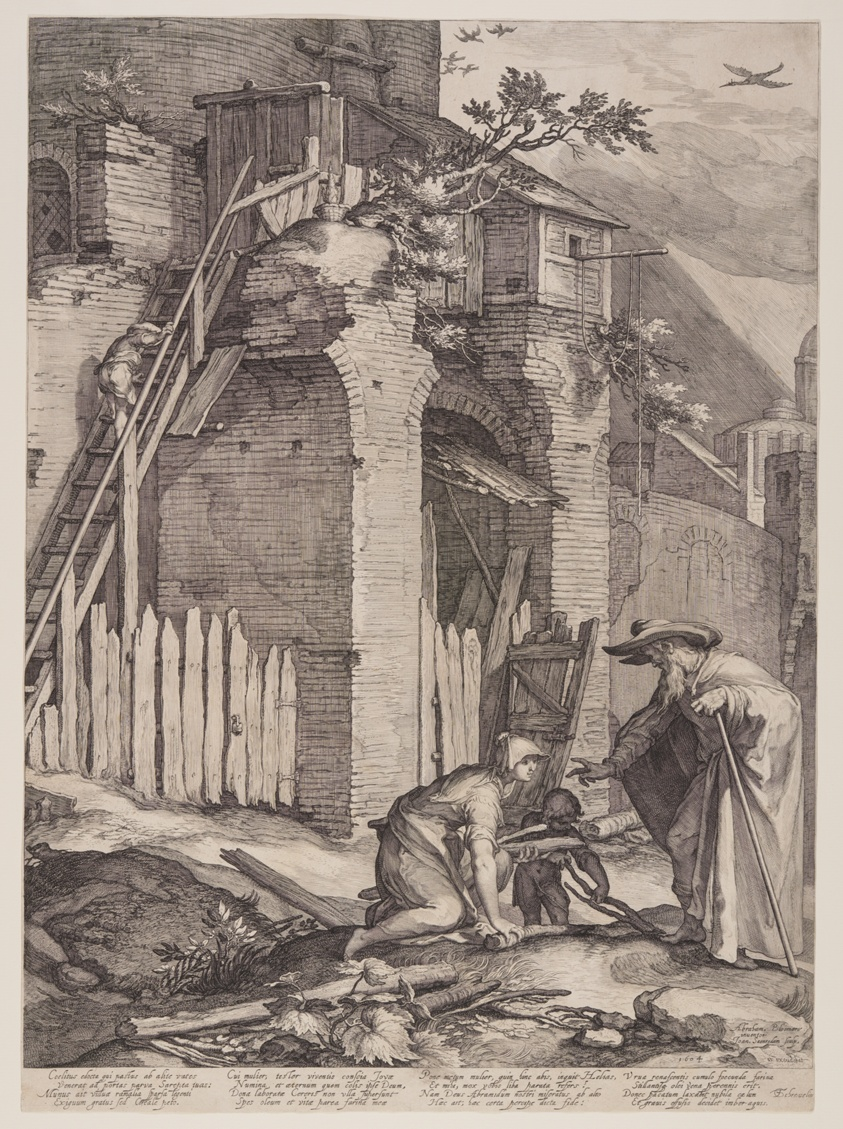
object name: Print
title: Prophet Elijah with the Widow of Zarephath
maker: Jan Saenredam (Dutch, 1565–1607); after Abraham Bloemaert (Dutch, 1566–1651)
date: 1604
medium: Engraving on ivory laid paper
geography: Netherlands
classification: engraving; paper; print; prints and drawing